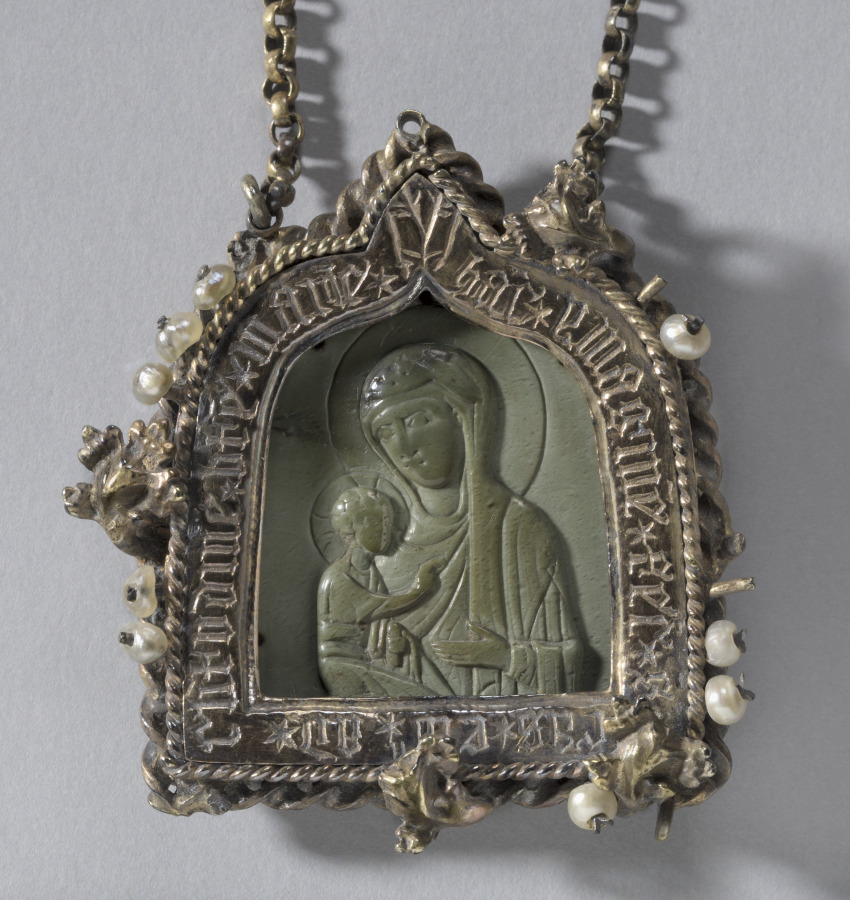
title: Pendant Icon with the Virgin "Dexiokratousa" and Frame with Winged Bull of Saint Luke on the back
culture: Byzantium (pendant); Germany, Aachen (frame), Byzantine period, 12th century (pendant); Byzantine period, 14th century (frame)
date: pendant 1100s; frame mid-1300s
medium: steatite, gilt silver, pearls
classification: Glyptic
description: This small-scale Byzantine icon depicts a half-length figure of the Virgin holding the Christ child. When the icon was mounted in its present frame by a German artist in the 14th century, it was considered to be an authentic portrait painted by Saint Luke. This claim, made in an inscription on the frame, is further emphasized by the ox, Saint Luke’s symbol, engraved on the frame’s reverse.